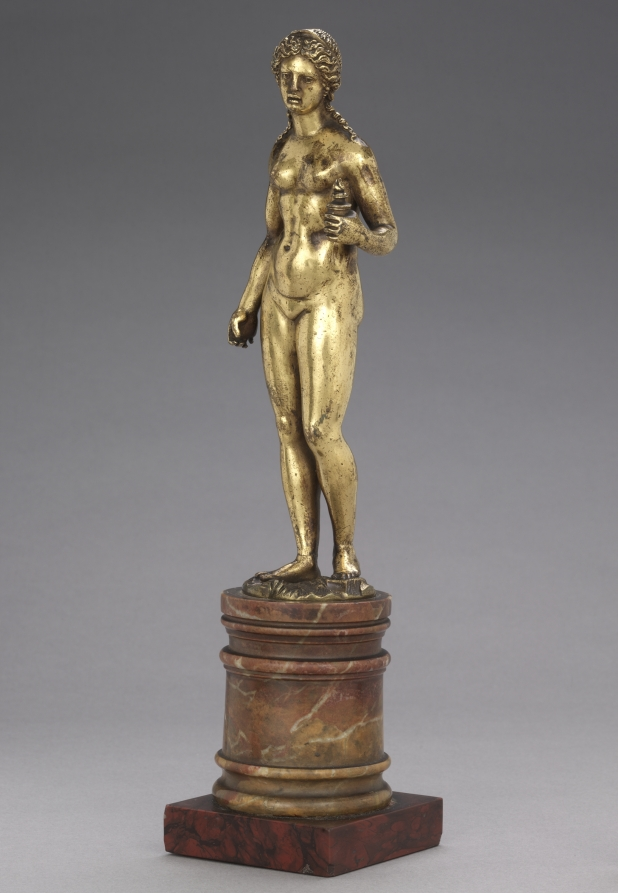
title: Venus with a Burning Urn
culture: Northern Italy, 16th century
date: c. 1500–1520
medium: gilt bronze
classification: Sculpture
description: Venus is the Roman goddess of many virtues, including Love, Charity, Fertility, and Victory. Here, Venus is represented as the goddess of Charity. She wears a crown, as Charity is often depicted as the Queen of the Virtues. The flaming lamp in Venus's left hand was also a symbol of Charity in Venice, where this piece is thought to have originated. The bent fingers of her right hand are bent suggest that Venus may have once held another object. Renaissance sculptors often looked back to antiquity when producing monumental and small bronze statues. The small bronze cabinet piece comes into Italian art during this time, bringing ancient gods and goddesses into Italian households. Venus stands in a contrapposto pose and, like Hellenistic and Roman objects, her locks are tied by a double ribbon while two curls fall on her shoulders. Her tilted head and large emotional eyes, as well as her small nose and parted lips reflect the influence of Hellenistic Greek facial styles.